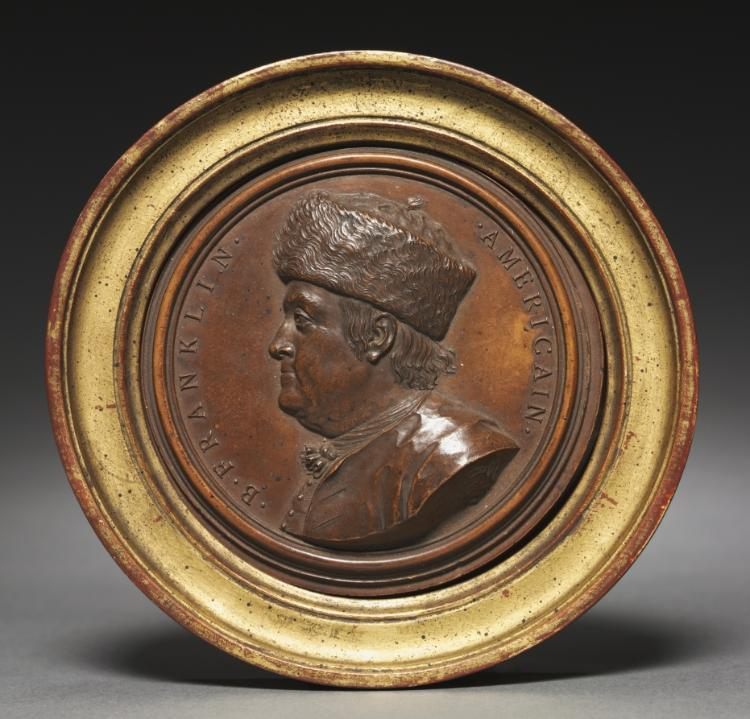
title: Portrait of Benjamin Franklin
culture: France, 18th century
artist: Giovanni Battista Nini (Italian, 1717–1786)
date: 1777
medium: terracotta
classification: Sculpture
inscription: inscribed along the circumference: B. FRANKLIN. AMERICAIN; inscribed below: NINI F 1777 [with coat-of-arms].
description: Scholars debate whether Nini met Benjamin Franklin personally or based the nine versions of his portrait on drawings by artist Thomas Walpole (British, 1755-1840). In this particular cast, Nini presents Franklin with a fur hat, which may be an allusion to French philosopher Jean-Jacques Rousseau, suggesting a comparison between the inventor and the philosopher and their roles in revolutionary politics on both sides of the Atlantic. Nini copied Franklin's fur hat from a portrait of Rousseau by Allan Ramsay (Scottish, 1713-1784). The small crest below Franklin's left shoulder shows a bolt of lightning striking an iron bar held by a hand, a reference to Franklin's discovery of the lightning rod and electricity.